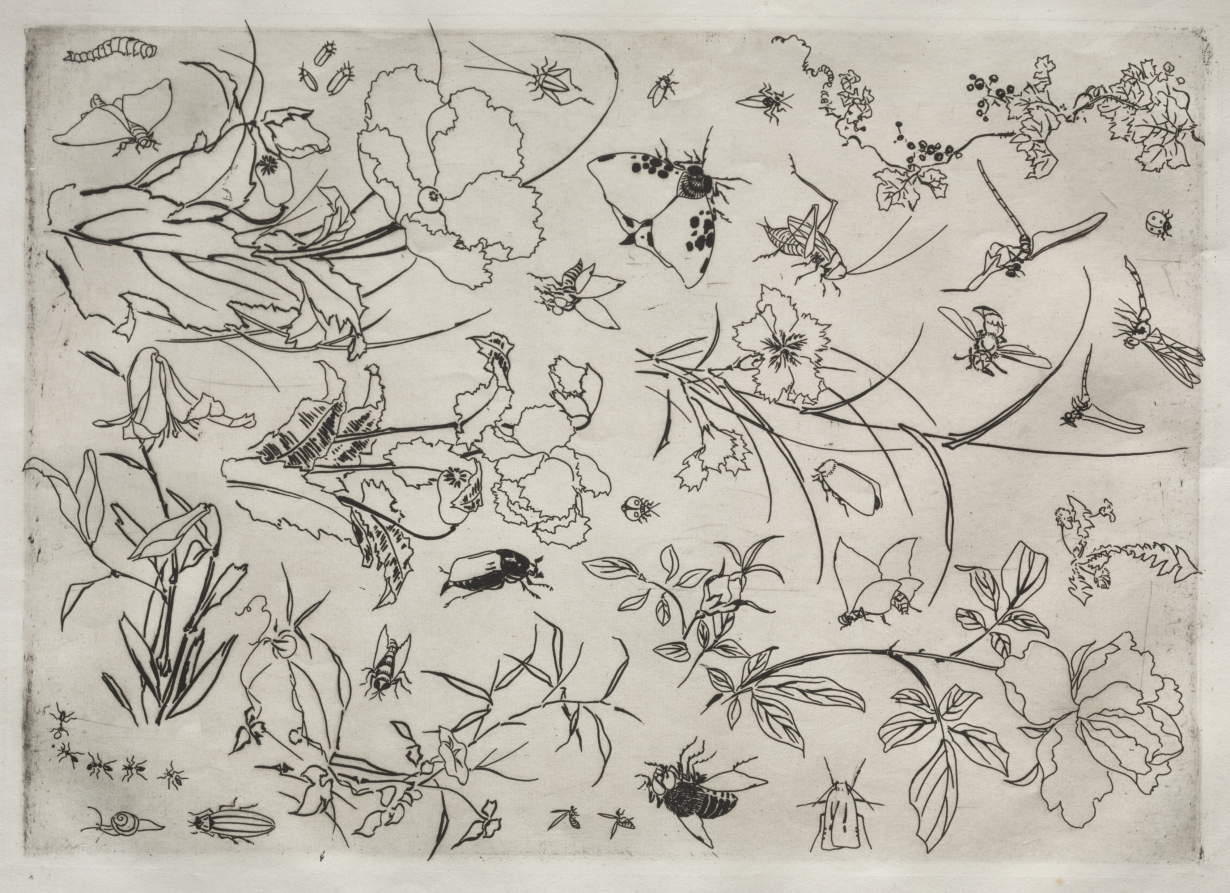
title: Dinner Service (Rousseau service): Flowers and Insects (no. 15)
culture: France, 19th century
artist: Félix Bracquemond (French, 1833–1914)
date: 1866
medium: etching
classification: Print